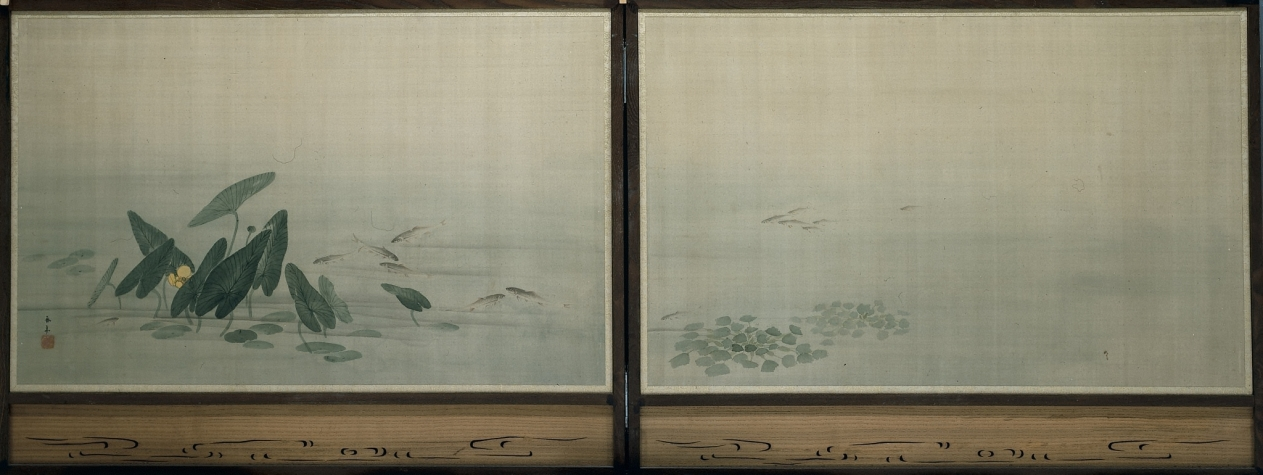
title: Fish in a Lotus Pond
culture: Japan, Edo period (1615–1868)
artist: Ōhara Donshū (Japanese, d. 1857)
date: 1800s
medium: two-fold screen; ink and color on silk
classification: Painting